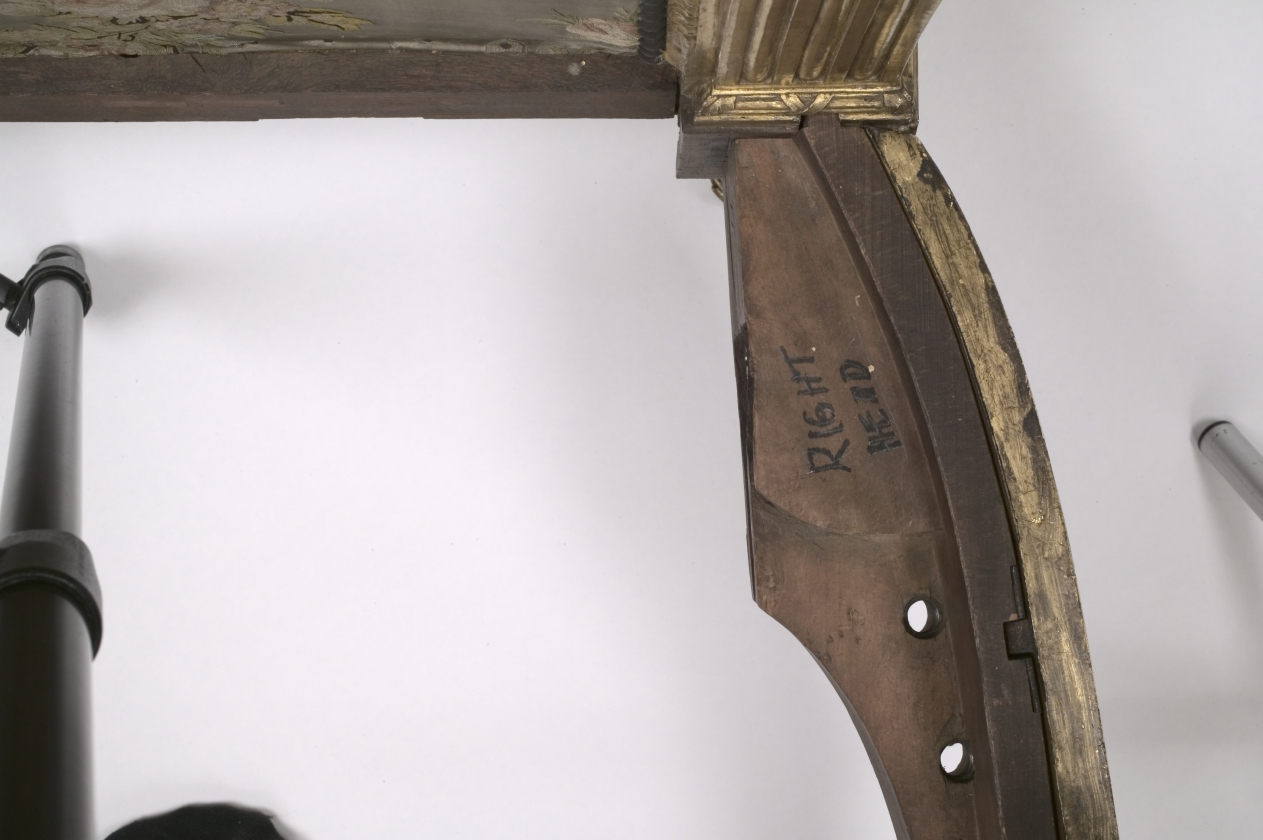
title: Bed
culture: France, 18th century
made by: attributed to Georges Jacob (French, 1739–1814)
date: 1700s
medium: gilded wood and embroidered satin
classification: Furniture and woodwork